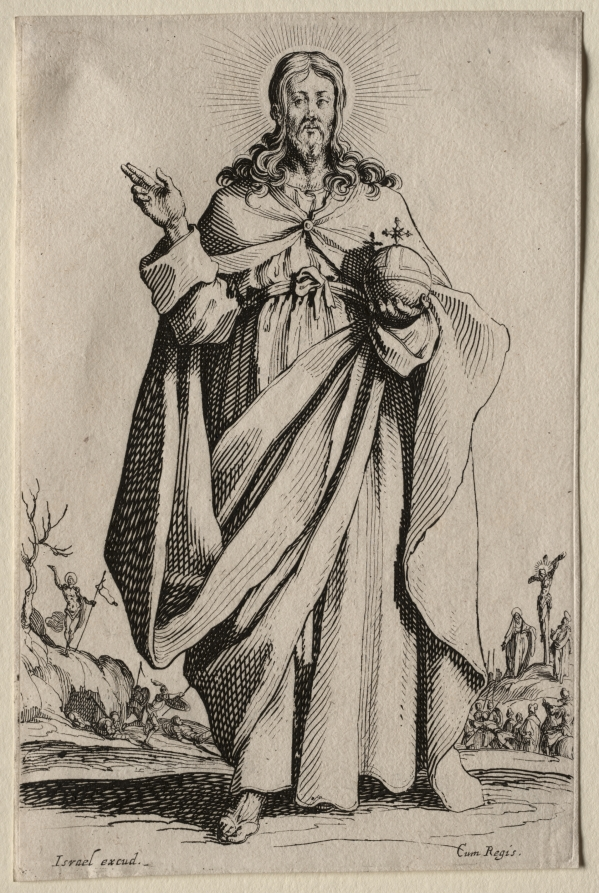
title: Salvatoris Beatae Mariae Virginis Sanctorum Apostolorum Icones / Les Grands Apôtres (The Large Apostles): The Savior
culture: France, 17th century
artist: Jacques Callot (French, 1592–1635)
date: ca. 1631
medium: etching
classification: Print